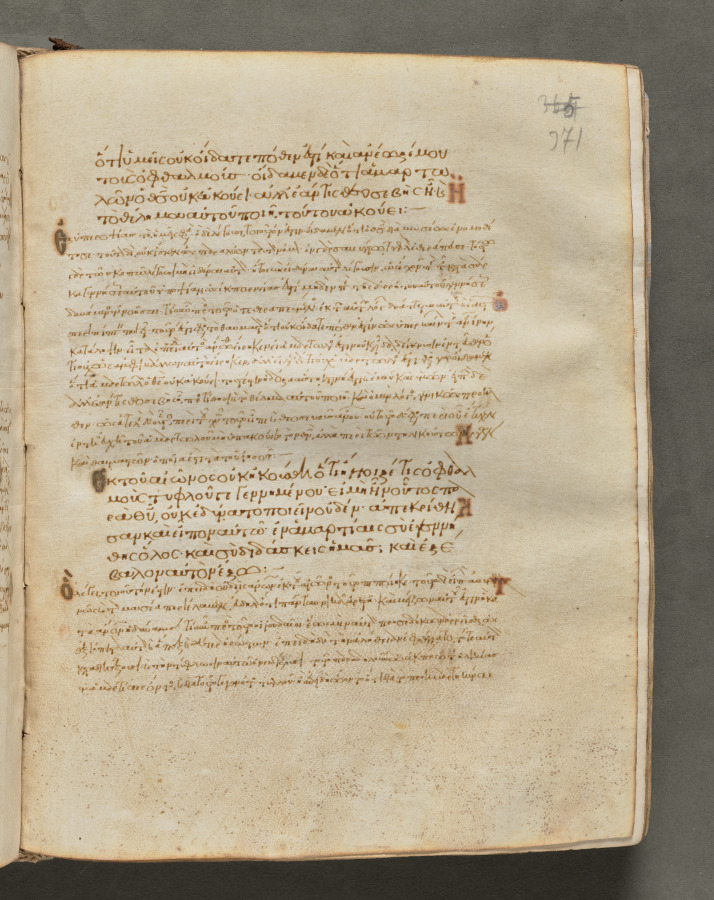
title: Text, folio 371 (recto), from a Gospel Book with Commentaries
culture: Byzantium, Constantinople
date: c. 1000–1100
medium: ink, tempera, and gold on vellum; leather binding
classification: Bound Volume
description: Each of the four gospels in this book opens on a page with brilliantly illuminated borders depicting the author of the text as well as birds—principally peacocks, symbols of the immortality of the soul—and fountains, representing the fountain of life and the salvation of the soul. This volume consists of 428 leaves with texts in Greek. Its level of sophistication suggests that it was probably written and decorated in a monastery in Constantinople.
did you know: Gospel books were carried in procession through Byzantine churches.